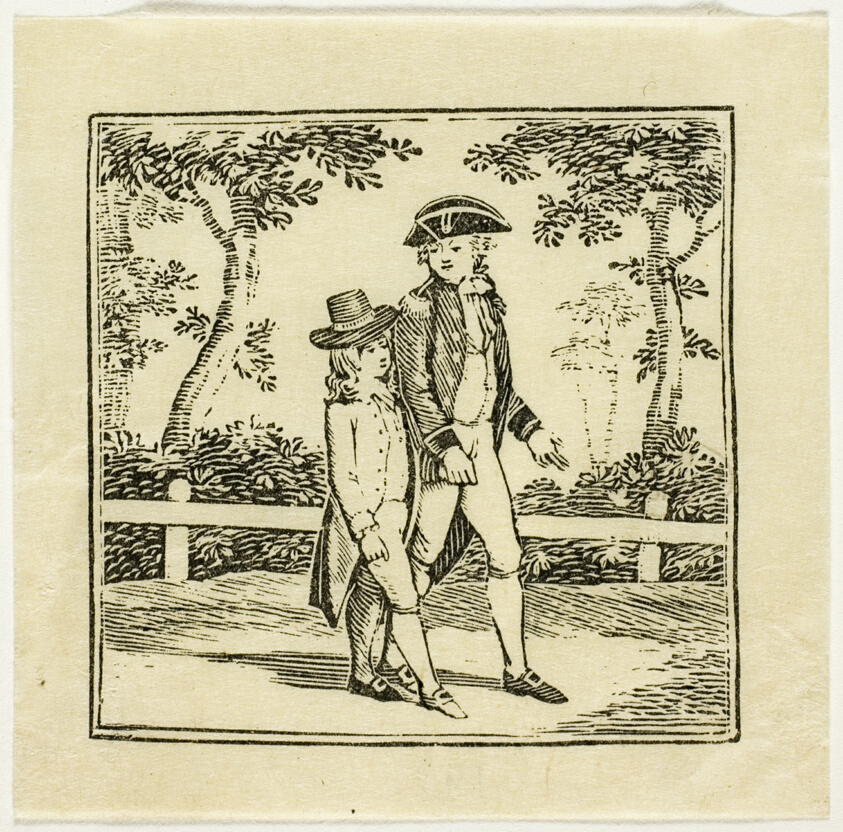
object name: Print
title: Book Illustration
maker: Thomas Bewick (English, 1753-1828)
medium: Wood engraving on paper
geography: England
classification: wood engraving; print; prints and drawing